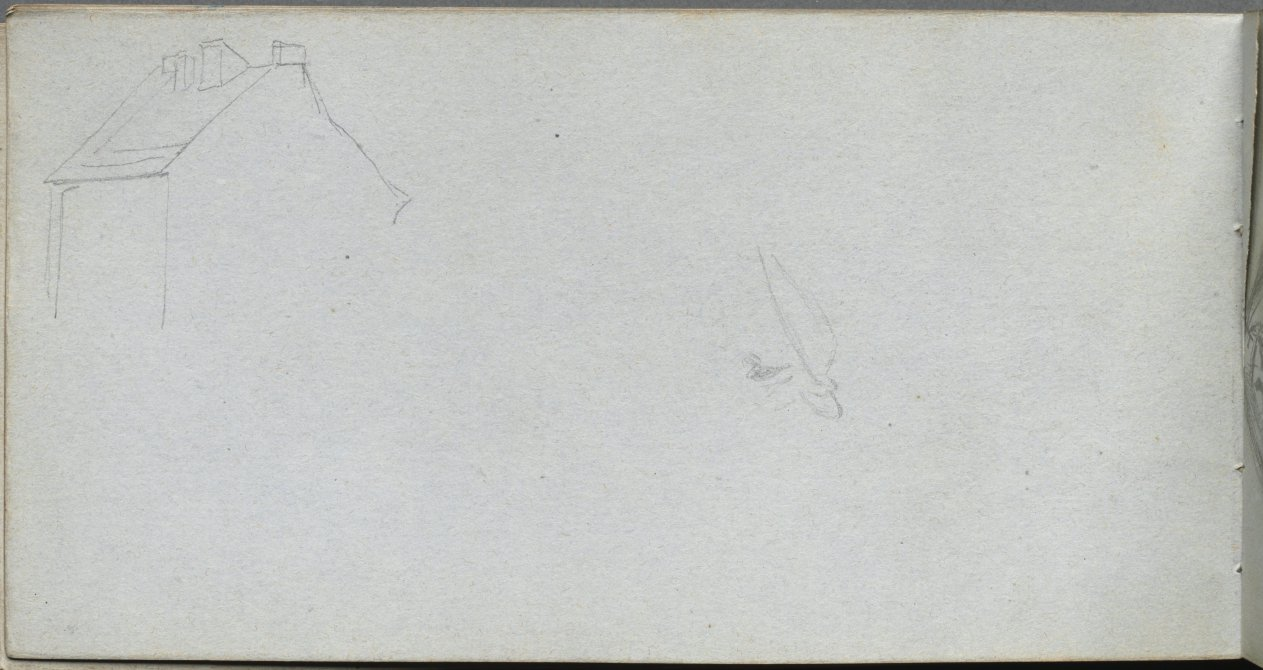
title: Sketchbook, page 54: Architecture Study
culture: France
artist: Ernest Meissonier (French, 1815–1891)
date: c. 1860s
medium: graphite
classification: Bound Volume